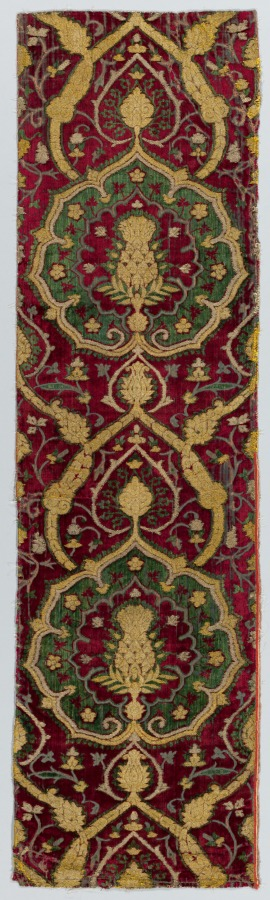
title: Brocaded Velvet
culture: Turkey, early 16th Century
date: c. 1500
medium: velvet: silk, brocaded with gold and silver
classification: Velvet